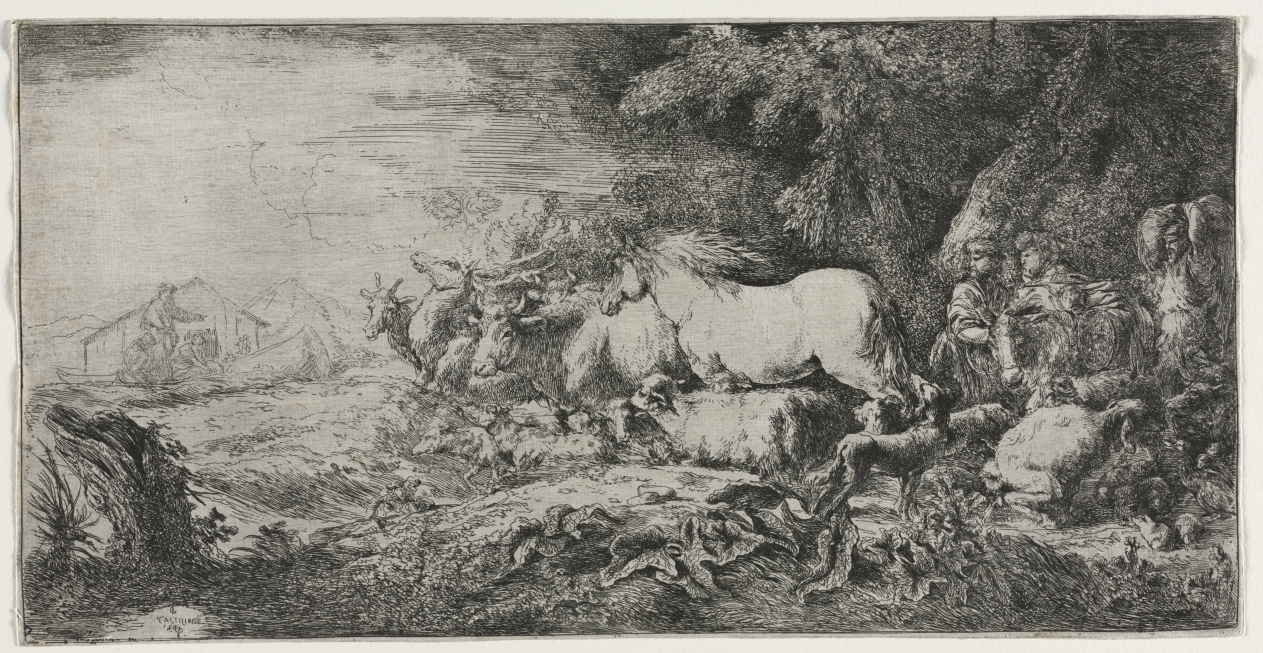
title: Noah and the Animals Entering the Ark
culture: Italy, 17th century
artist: Giovanni Benedetto Castiglione (Italian, 1609–1664)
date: 1650–55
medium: etching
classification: Print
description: Animals were among Giovanni Benedetto Castiglione’s favorite subjects, leading him to frequently depict the biblical story of Noah’s Ark. Here, a group of men guide horses, deer, dogs, goats, and even guinea pigs toward the ark. After viewing etchings by his contemporary Rembrandt, whose work was not yet known widely in Italy, Castiglione recognized the potential of the medium. He emulated the Dutch master’s sketchy, draftsman-like approach and created a recession into space by combining deeply and lightly etched lines. The lush landscape, with its complicated layers of vegetation that swirl with movement, is a distinctive feature of Castiglione’s technique.